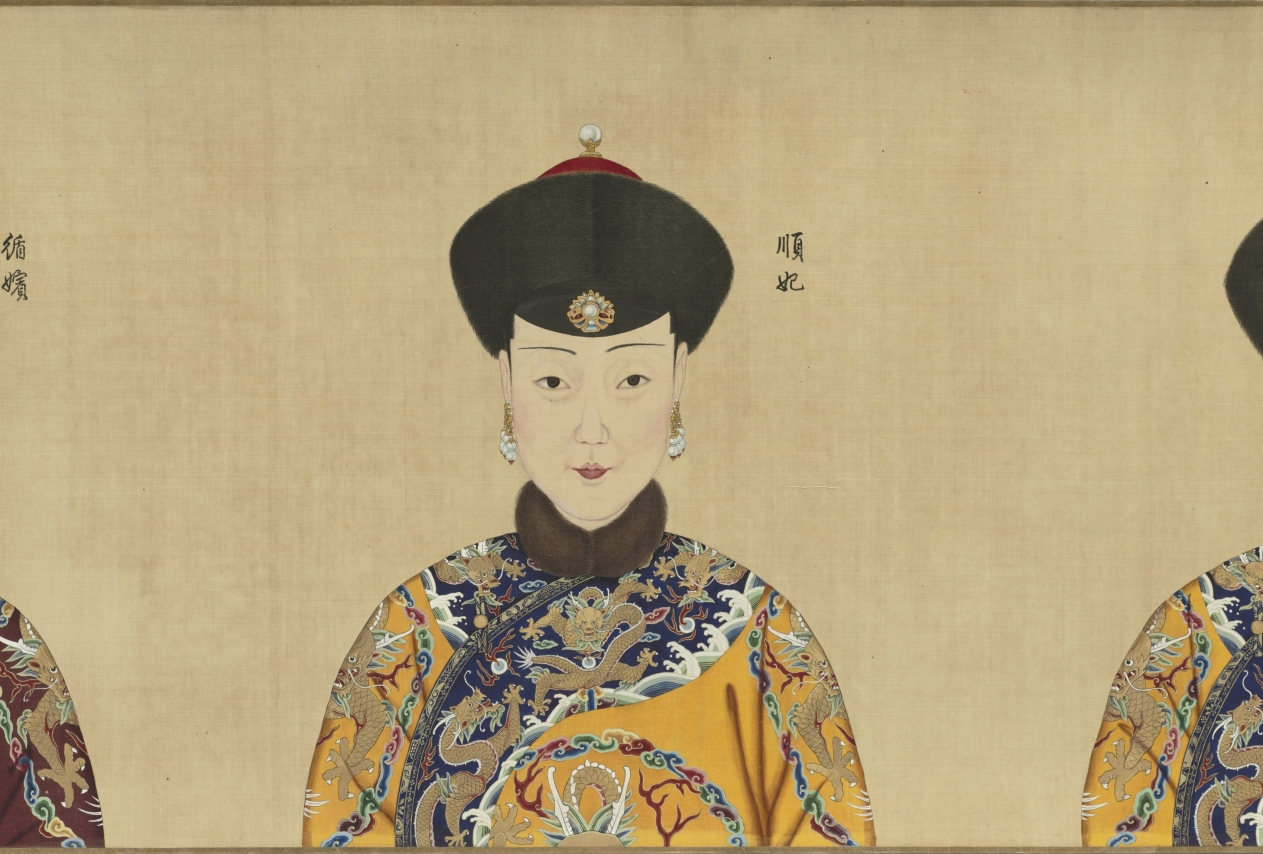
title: Portraits of the Qianlong Emperor and His Twelve Consorts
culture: China, Qing dynasty (1644–1911), Qianlong reign (1736–95)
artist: Giuseppe Castiglione (Italian, 1688–1766)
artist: and others (Chinese)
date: 1736–70s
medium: Handscroll; ink and color on silk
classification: Painting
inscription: 9 seals of the Qianlong emperor (r. 1736–95).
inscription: The eighth month, first year of Qianlong [1736] 乾隆元年八月吉日. The Empress (Xiaoxian) 皇后 (1712–1748), The Guifei (Huixian) 貴妃 (?-–1745), Chunfei 純妃 (1713–1760), Jiafei 嘉妃 (?–1755), Lingfei 令妃 (1727–1775), Shufei 舒妃 (1728–1777), Qingbin 慶嬪 (1724–1774), Yingbin 穎嬪 (1731–1800), Xinbin 忻嬪 (?–1764), Dunfei 惇妃 (1746–1806), Xunfei 順妃 (1749–1788), Shunbin 循嬪 (?–1797).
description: This portrait shows the Qianlong emperor at 26, in the first year of his reign. His likeness is followed by portraits of the empress and eleven consorts. Their portraits document the appearances of the court women around the time when they received their respective imperial titles, which occurred at different stages of the emperor's life. The first three portraits were done by the Jesuit (Roman Catholic) missionary artist Giuseppe Castiglione, whereas the later ones were by Chinese court painters. Formal portraiture contributed to the affirmation of status and construction of role and identity. This scroll served as both familial documentation and a "mind picture" of the Qianlong emperor, suggesting that his constructed image of emperorship was inseparable from concepts of self and family. It was stored in a carved red lacquer box bearing the original painting title Mind Picture of a Well-Governed and Tranquil Reign (see CMA 1969.32).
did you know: Lingfei 令妃 (1727–1775), the first consort depicted in the maroon or “incense-colored" 香色 robe, was the mother of six of Qianlong’s children, including the future Emperor Jiaqing.